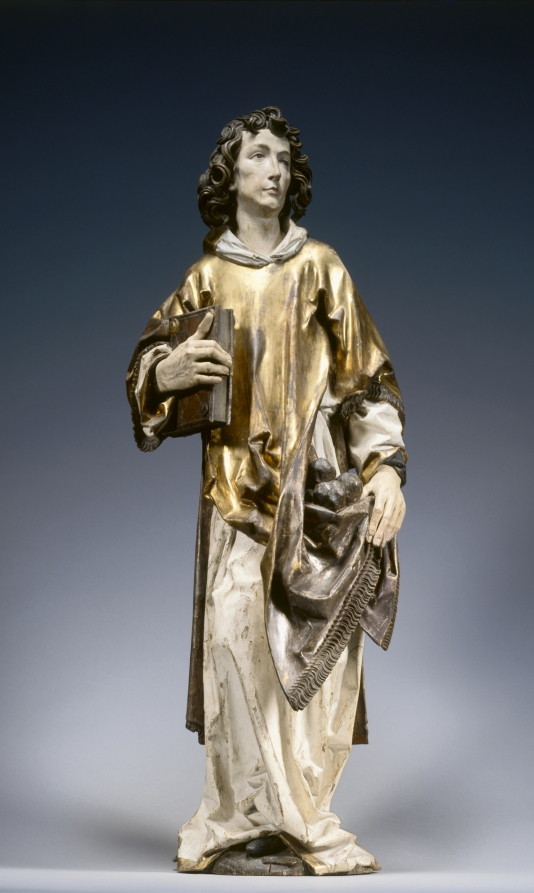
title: Saint Stephen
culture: Germany, Würzburg, 16th century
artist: Tilman Riemenschneider (German, active Würzburg, c. 1460–1531)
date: 1502–8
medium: lindenwood with polychromy and gilding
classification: Sculpture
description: This sculpture, along with that of Saint Lawrence (1959.42) and two others in Germany, are believed to be the remaining fragments of a large altarpiece carved by Riemenschneider for the Dominican convent in Rothenburg in Franconia (demolished in 1813). Saints Stephen and Lawrence both wear the dalmatic to indicate their status as deacons in the early church. Each holds a symbol of his martyrdom; here, Saint Stephen cradles some stones to indicate his death by stoning. Art in Germany through the early 1500s remained firmly anchored in the late Gothic style with its associated interests in realism. Riemenschneider was one of the most prolific and versatile sculptors of this style, a recognized master in both stone and wood. His flourishing workshop employed as many as 40 apprentices in sculpting, woodcarving, and painting. His sculptures are noted for the dreamy, melancholy, and introspective quality in their expressions, as well as their remarkable attention to detail.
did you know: Tilman Riemenschneider (c. 1460–1531) is probably the most famous German sculptor of the period around 1500.